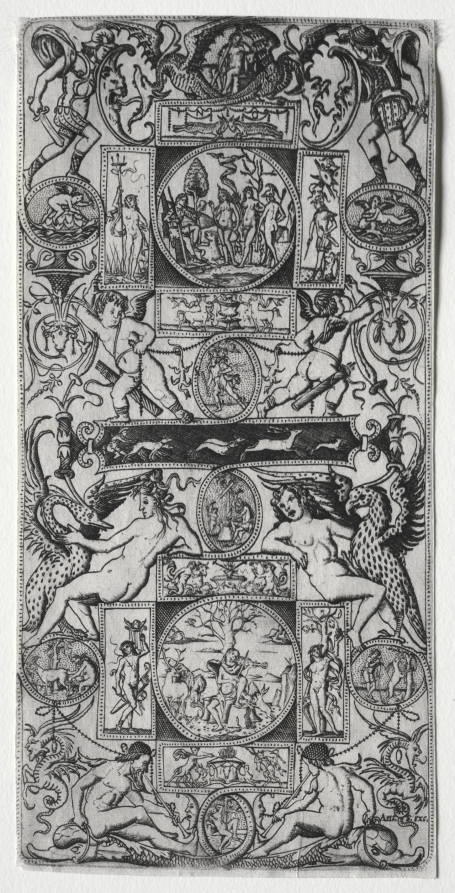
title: Orpheus and the Judgment of Paris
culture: Italy, 16th century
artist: Nicoletto da Modena (Italian, active c. 1500–1520)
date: c. 1507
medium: engraving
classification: Print